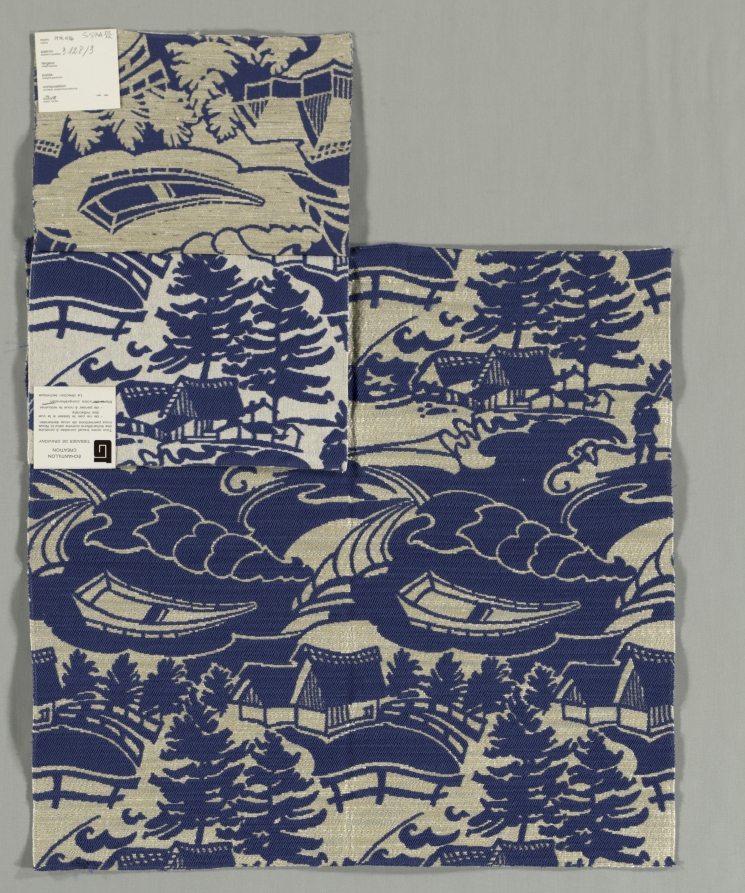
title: Showroom Sample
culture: France, Normandy, 20th century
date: 20th century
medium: damask weave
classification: Textile